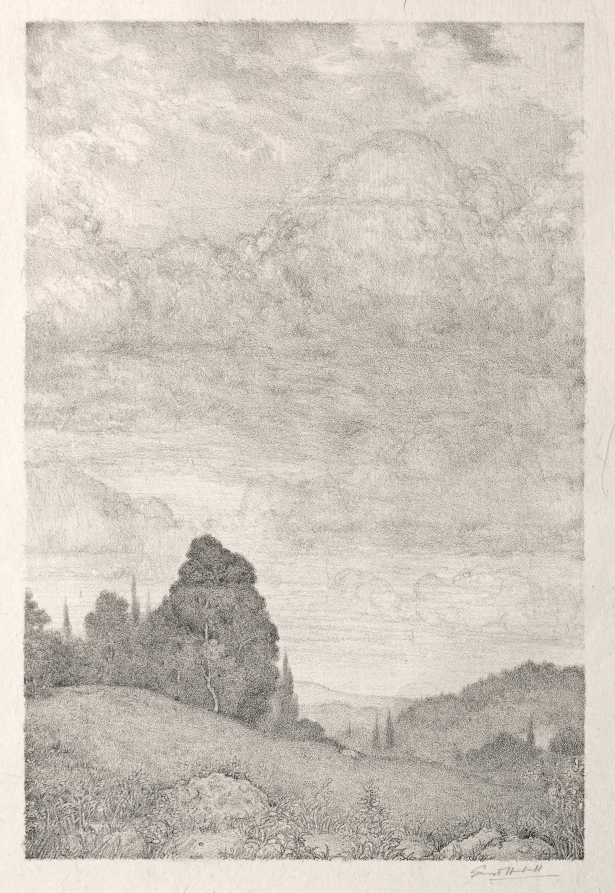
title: Crest of the Hill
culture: America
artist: Ernest Haskell (American, 1876–1925)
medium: lithograph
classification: Print